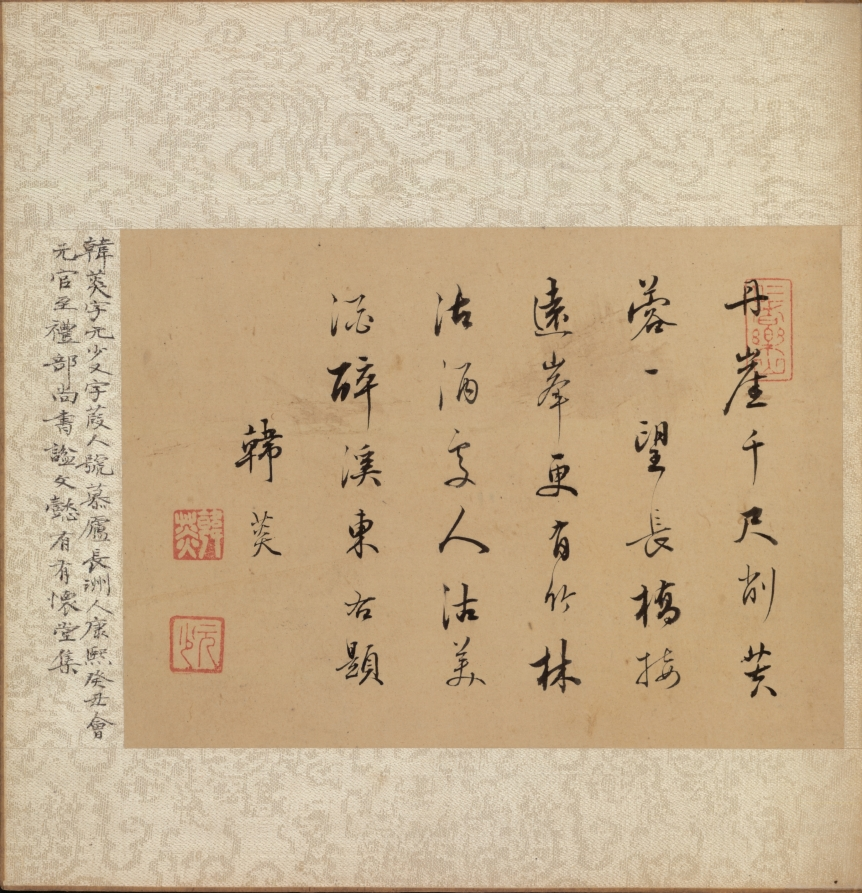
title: Album of Miscellaneous Subjects, Leaf 2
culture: China, Qing dynasty (1644-1911)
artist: Fan Qi (Chinese, 1616–after 1694)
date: early 1650s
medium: album leaf, ink and color on silk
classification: Painting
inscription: Artist seal: Fan Qi 樊圻. Poem by Han Tan 韓菼 (1637–1704): A thousand feet of red cliffs look like a sculptured flower of Fu-yung;/ In one glance, the long bridge joins adjacent ridges./ Furthermore a wine shop stands in a bamboo grove;/ The fellow who bought some good wine is drunk on the eastern shore of the stream.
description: Fan Qi's painting on this second leaf of the album is, perhaps, based on Du Mu's poetic line: The herdboy pointed to the distant Apricot Village. Han Tan's calligraphic colophon facing the painting reads: A thousand feet of red cliffs look like a sculptured flower of furong; In one glance, the long bridge joins adjacent ridges. Furthermore a wine shop stands in a bamboo grove; The fellow who bought some good wine is drunk on the eastern shore of the stream.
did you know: A wine shop's flag is visible above the bamboo grove.